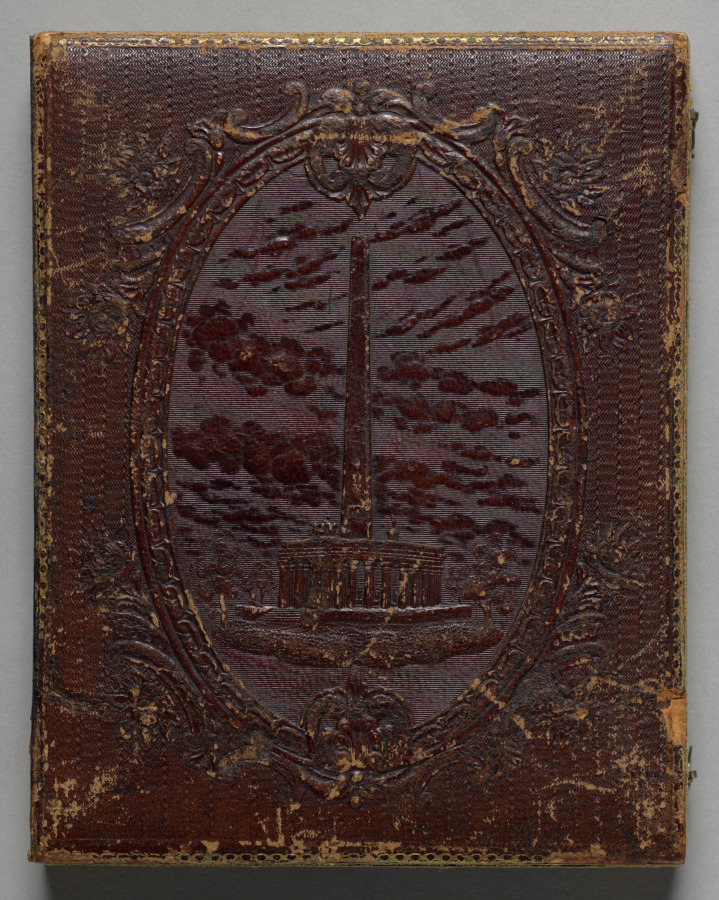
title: Buggy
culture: America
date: c. 1853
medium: daguerreotype, half-plate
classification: Photograph